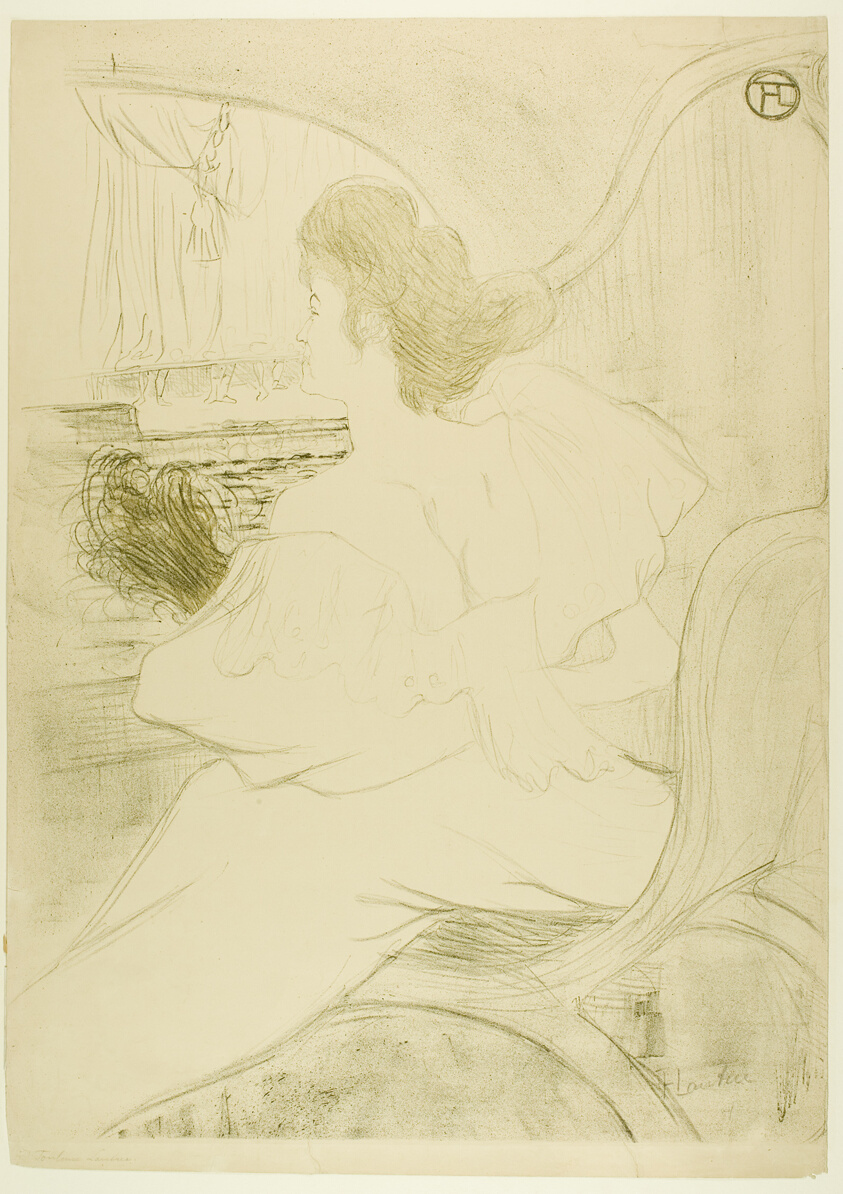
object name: Print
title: Cover for L'Estampe originale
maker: Henri de Toulouse-Lautrec (French, 1864-1901); printed by Ancourt et Cie. (French, 19th c.); published by L'Estampe originale (French, 1893-1895)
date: 1895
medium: Color lithograph on cream wove paper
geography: France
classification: lithograph; print; prints and drawing